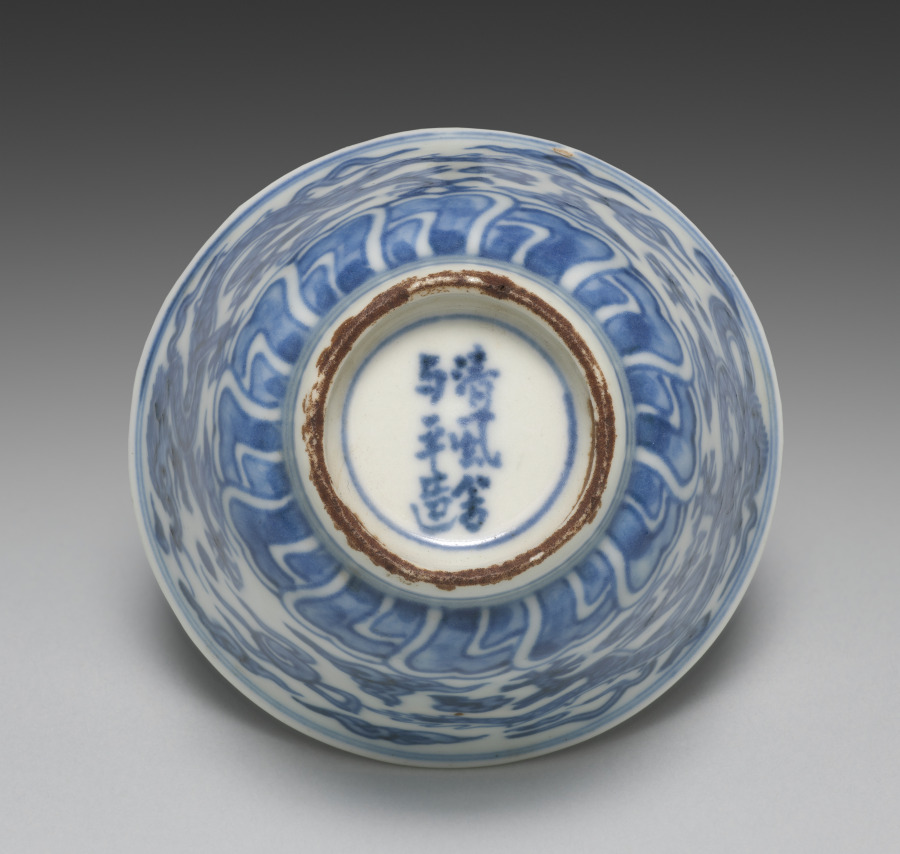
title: Cup from Tea Cups with Dragons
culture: Japan, Edo period (1615–1868)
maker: Seifū Yohei I (Japanese, 1801–1861)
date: 1840s–57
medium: One from a set of five tea cups; porcelain with underglaze blue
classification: Ceramic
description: Seifū Yohei I made both blue and white porcelains after Ming dynasty (1368–1644) Chinese wares fired in the kilns at Jingdezhen for export. He also made colorful stoneware in the style of his teacher, Nin’ami Dōhachi (Takahashi Dōhachi II) (1783–1855).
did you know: A small figure of an elephant serves as the handle for the lid.